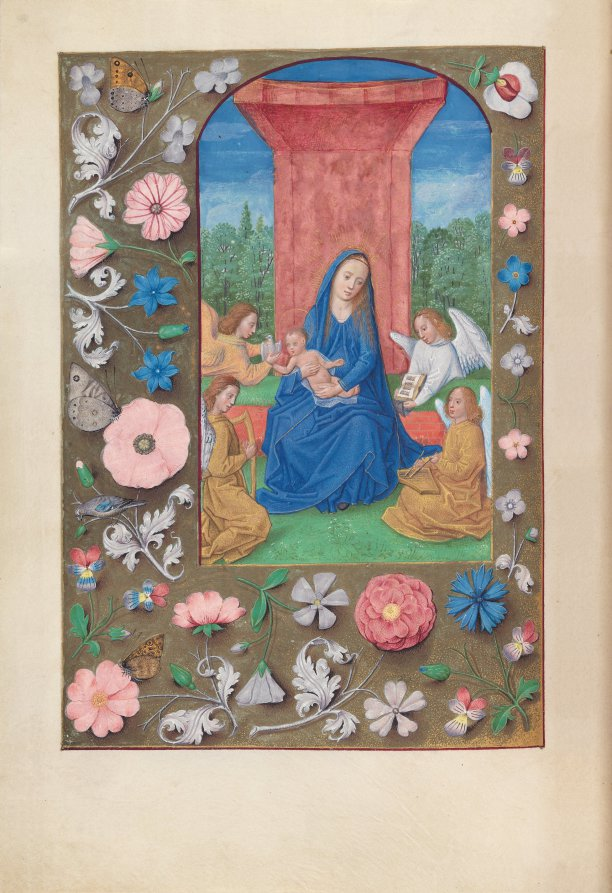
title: Hours of Queen Isabella the Catholic, Queen of Spain: Fol. 80v, Virgin & Christ with Angels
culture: Flanders, Ghent and Bruges, late 15th century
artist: Master of the First Prayerbook of Maximillian (Flemish, c. 1444–1519)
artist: and Associates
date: c. 1500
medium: ink, tempera, and gold on vellum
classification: Bound Volume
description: This manuscript was illuminated by a circle of at least five highly organized manuscript painters active in the Flemish cities of Ghent and Bruges. The principal illuminator was Alexander Bening, who painted the majority of the book's miniatures. Manuscripts produced by this circle of artists are renowned for the decoration of their borders, which typically feature a rich variety of realistically-painted flowers, birds, and butterflies. This prayer book, called a book of hours, was intended not for a cleric, but for the private devotions of a lay person-in this case, Isabella the Catholic, Queen of Spain (1451-1504). Isabella's coat of arms embellishes the book's frontispiece. It is unlikely that the book was commissioned by the Queen herself; rather, she probably received it as a diplomatic gift from someone courting her patronage, perhaps Cardinal Francisco Jimenez de Cisneros. A Franciscan friar, Jimenez was dependent upon Isabella for his advancement, first to the post of Queen's confessor in 1492, and then to Archbishop of Toledo in 1495.